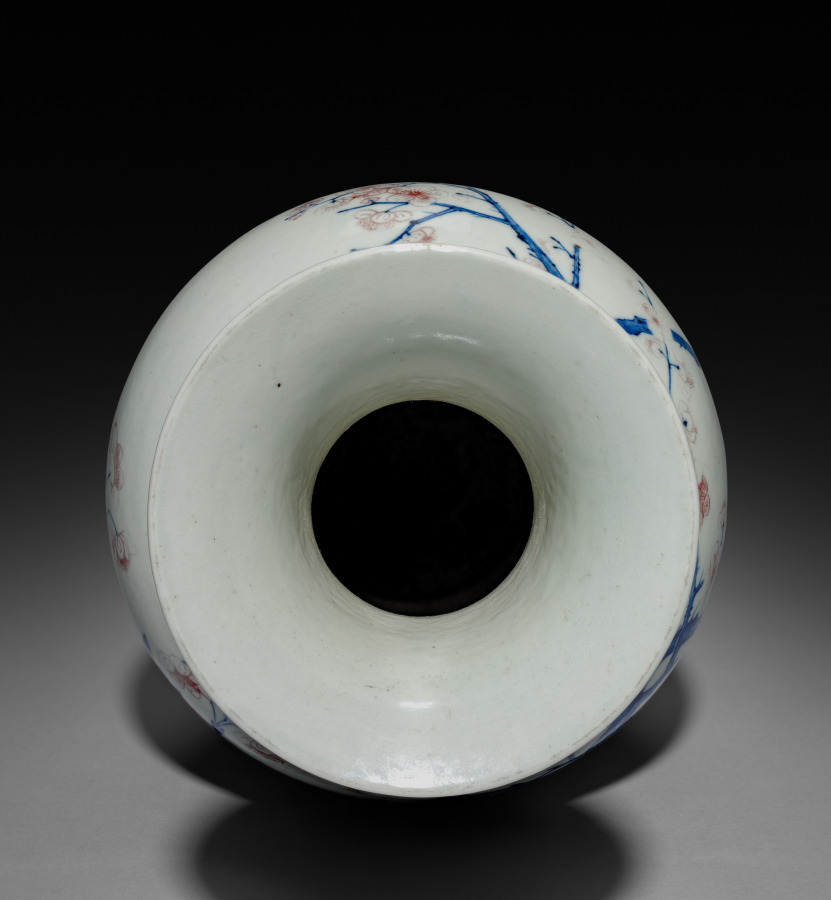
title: Vase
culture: China, Jiangxi province, Jingdezhen kilns, Qing dynasty (1644-1911), Yongzheng reign (1723-35)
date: 1723–35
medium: porcelain with underglaze blue and red decoration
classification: Ceramic